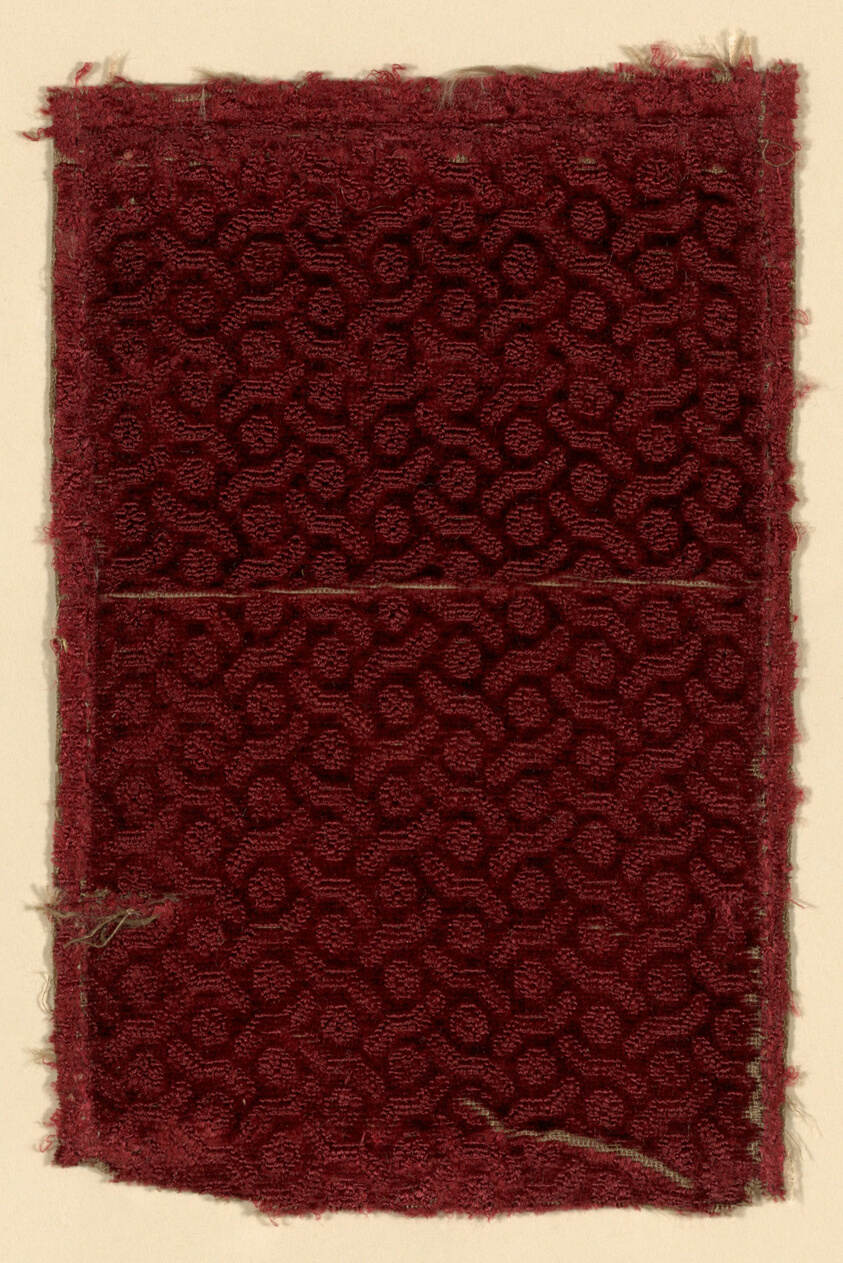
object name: Textile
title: Fragment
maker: Italy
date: 1775/1800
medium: Silk, warp-float faced broken twill weave with supplementary pile warps froming cut and uncut solid velvet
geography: Italy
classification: textile; weaving - velvet